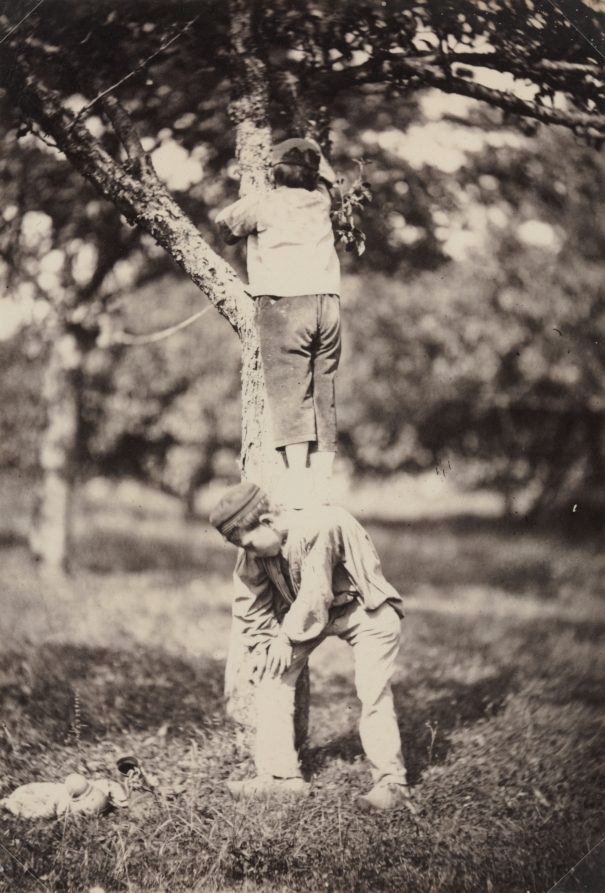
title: French Country Study: Two Boys Climbing a Tree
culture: France, 19th century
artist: Auguste Giraudon's Artist (French)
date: late 1870's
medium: albumen print from wet collodion negative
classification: Photograph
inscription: written in pencil on verso: "PF41102"